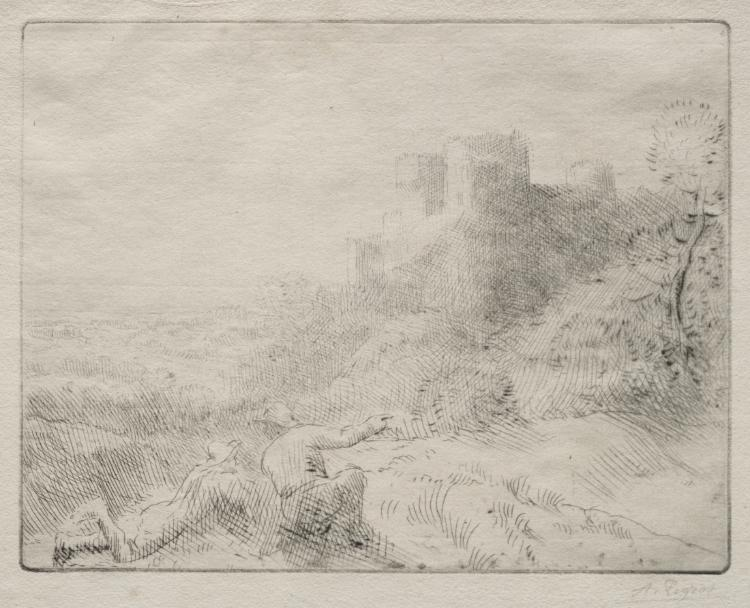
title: An Old Chateau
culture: France, 19th century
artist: Alphonse Legros (French, 1837–1911)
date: c. 1857–1911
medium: drypoint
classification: Print